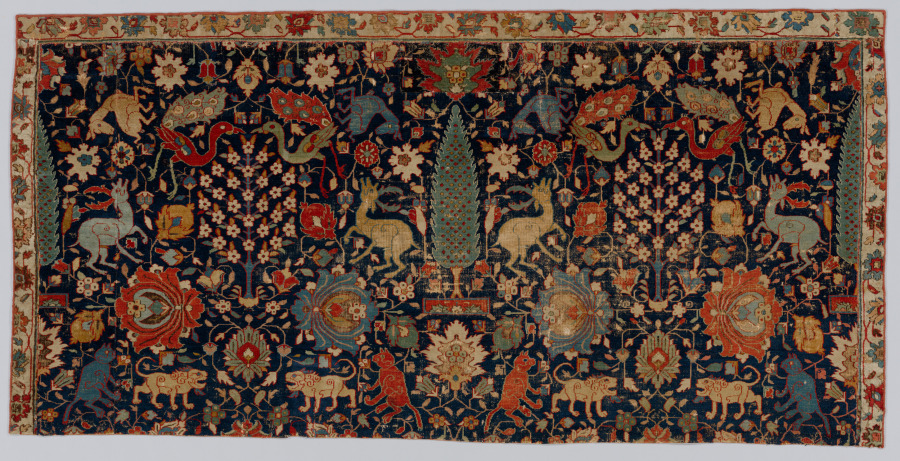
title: Portion of a Carpet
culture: Iran, Northwestern, 17th century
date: 1600s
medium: knotted pile: jufti knot; wool and cotton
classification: Carpet